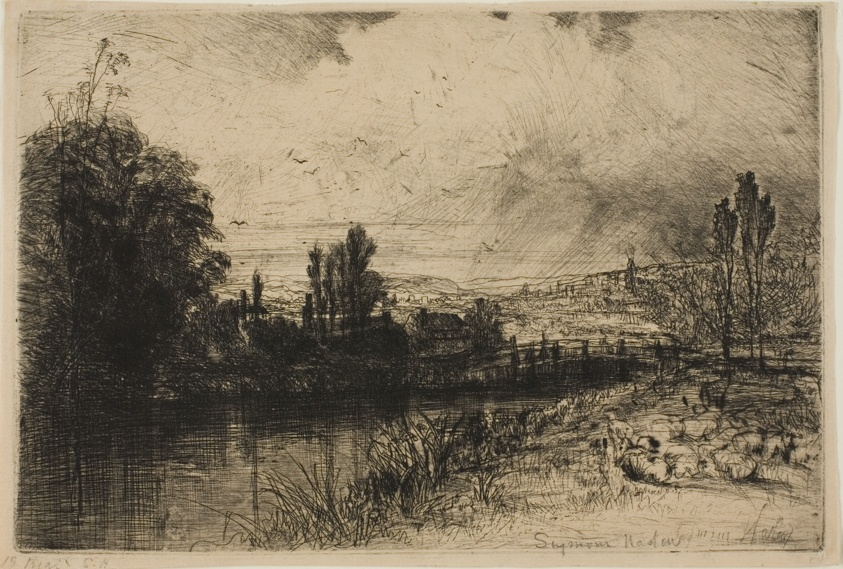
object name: Print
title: On the Test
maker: Francis Seymour Haden (English, 1818-1910)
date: c. 1859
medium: Etching with drypoint on cream laid paper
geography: England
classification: etching; print; prints and drawing